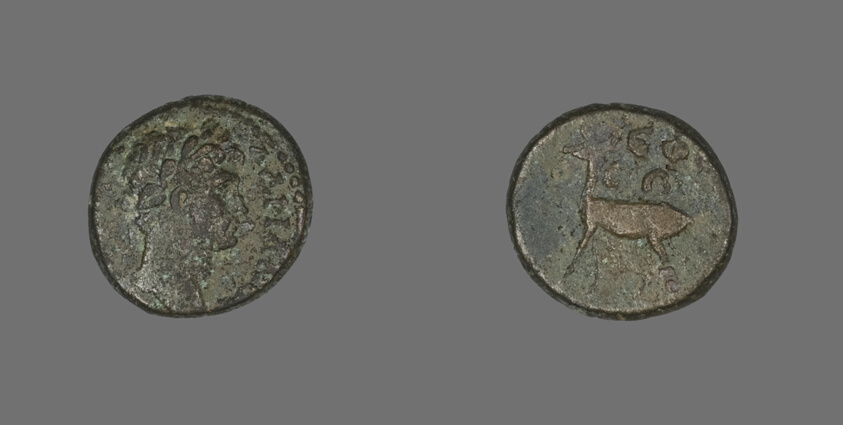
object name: Coin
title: Coin Depicting Emperor Hadrian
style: roman (ancient, style or period), ancient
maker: Roman; Ephesos, Ionia (now Izmir, Turkey)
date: 117-138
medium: Bronze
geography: Smyrna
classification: coin; ancient art